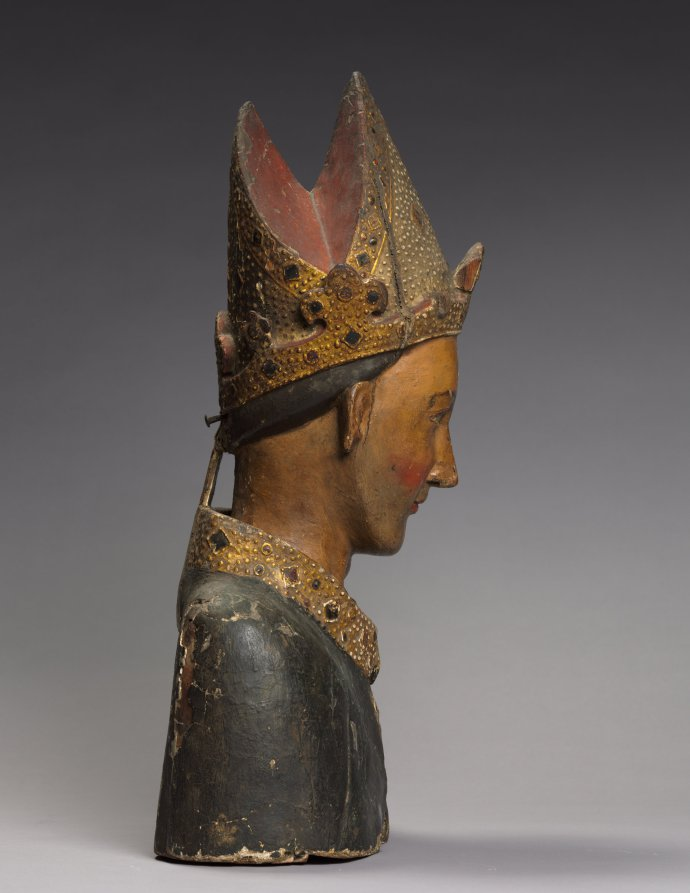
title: Bust Reliquary of St. Louis, Bishop of Toulouse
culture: Italy, Tuscany, Siena(?)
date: late 1300s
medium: wood (walnut) with polychromy, gesso and gilding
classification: Sculpture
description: This reliquary bust was probably made to house a relic of Saint Louis, Bishop of Toulouse (1274–97), second son of Charles II of Anjou, King of Naples (1288–1309). Renowned for his works of charity, he was made bishop in 1297 and died shortly after at the age of 23. He was canonized in 1317, and his cult of veneration spread rapidly in Italy and Spain. In art, Louis is generally represented as a "boy" bishop without a beard and with youthful features. The relic (now lost) would have been enshrined within. On feast days the reliquary would have likely been carried in procession and otherwise placed in a church sanctuary or on a side altar for the veneration of the faithful. Relics were the physical remains of the saints, chiefly their bodies. The living venerated the relics of the saints in order to seek their patronage, which in turn provided a proximate link to the divine ruler. The power of the saints was therefore manifested by and through their relics, or objects that were owned or touched by them. Medieval pilgrims, in a world fraught with peril, sought close physical contact with relics, which protected both the spiritual and temporal welfare of laypeople and religious communities.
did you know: This small bust was hewn out of wood, but painted realistically. Its life-like accuracy gave the medieval worshipper the sense that they were in the presence of the beloved bishop Saint Toulouse.